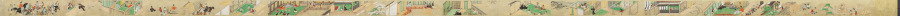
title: The Saltmaker's Story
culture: Japan, Edo period (1615–1868)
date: early 1600s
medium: One of a pair of handscrolls; ink, color, and gold on paper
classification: Painting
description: Once read and copied by girls at New Year’s celebrations and included in dowries, The Saltmaker’s Story is a rags-to-riches tale in which daughters are gifts from the gods. Despite his simple outlook, the main character progresses from humble roots as an associate at Kashima Shrine to the elite status of grandfather of the emperor through the intervention of the Kashima deity. The Saltmaker’s Story is traditionally presented in a set of three scrolls, but the text of this set has been removed by a previous owner, who remounted the illustrations as a pair. The paintings of this one take us from right to left through the second half of the tale.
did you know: This handscroll originally had texts before its paintings, but the texts were removed.